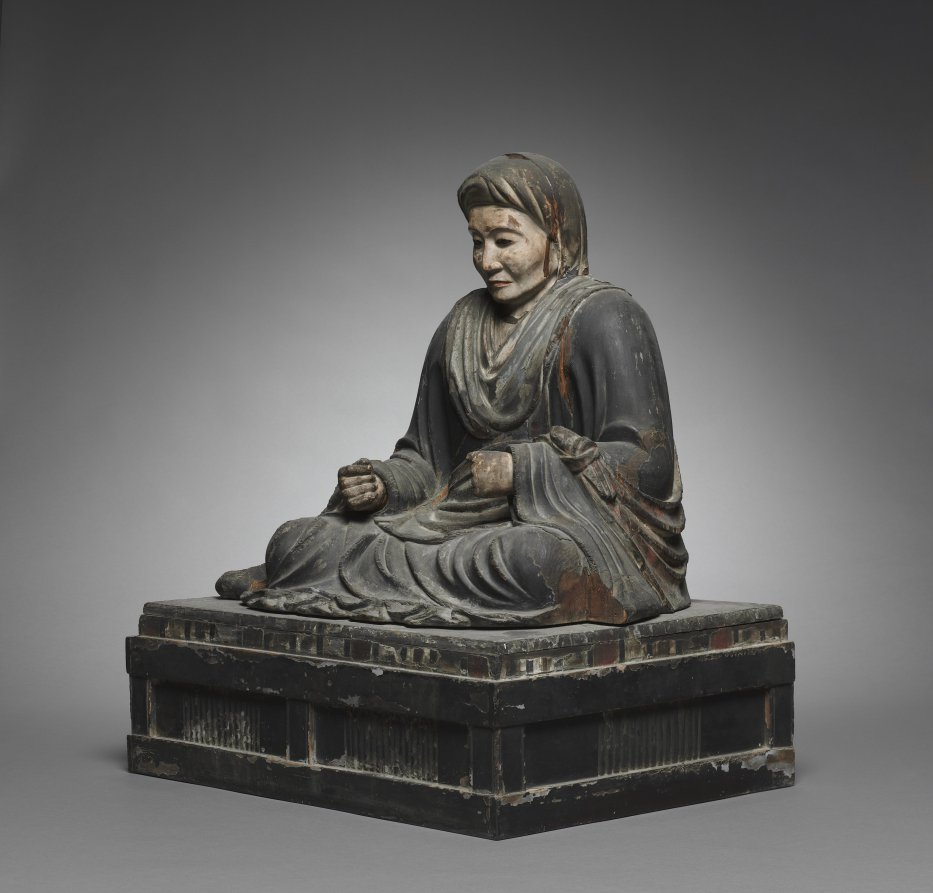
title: Portrait of the Mother of Hotto Kokushi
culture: Japan, Edo period (1615–1868)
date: 1680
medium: wood with polychromy and inlaid crystal and stone eyes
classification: Sculpture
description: This is an imaginary portrait of the mother of the Zen master Hottō Enmyō Kokushi (1203–1298), whose sculptural portrait (1970.67) can be seen in gallery 235B. That image was carved soon after the master's death. His mother's image, however, was completed several hundred years later, so the likeness is doubtful.